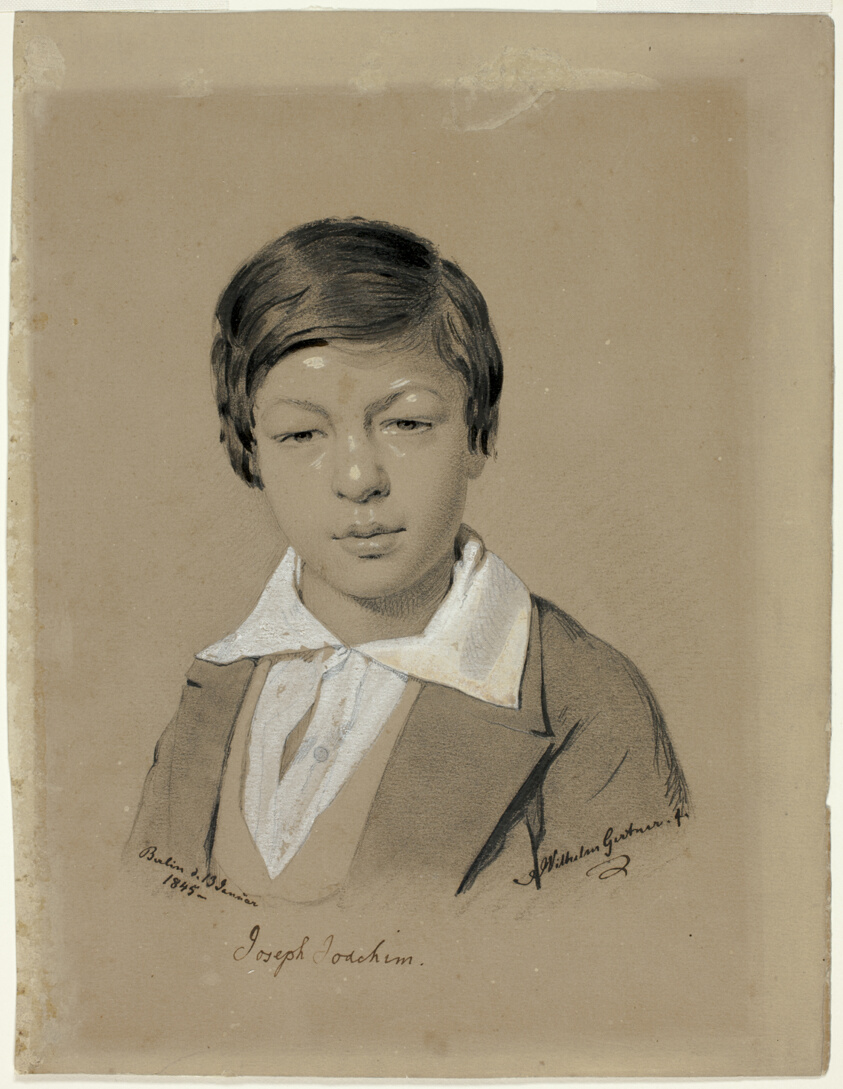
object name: Drawing and Watercolor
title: Joseph Joachim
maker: Wilhelm Girtner (probably German, 19th century)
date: 1845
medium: Graphite, with pen and brush and black ink, heightened with white gouache, on tan wove paper discolored to pale brown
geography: Berlin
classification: graphite; drawings (visual works); prints and drawing